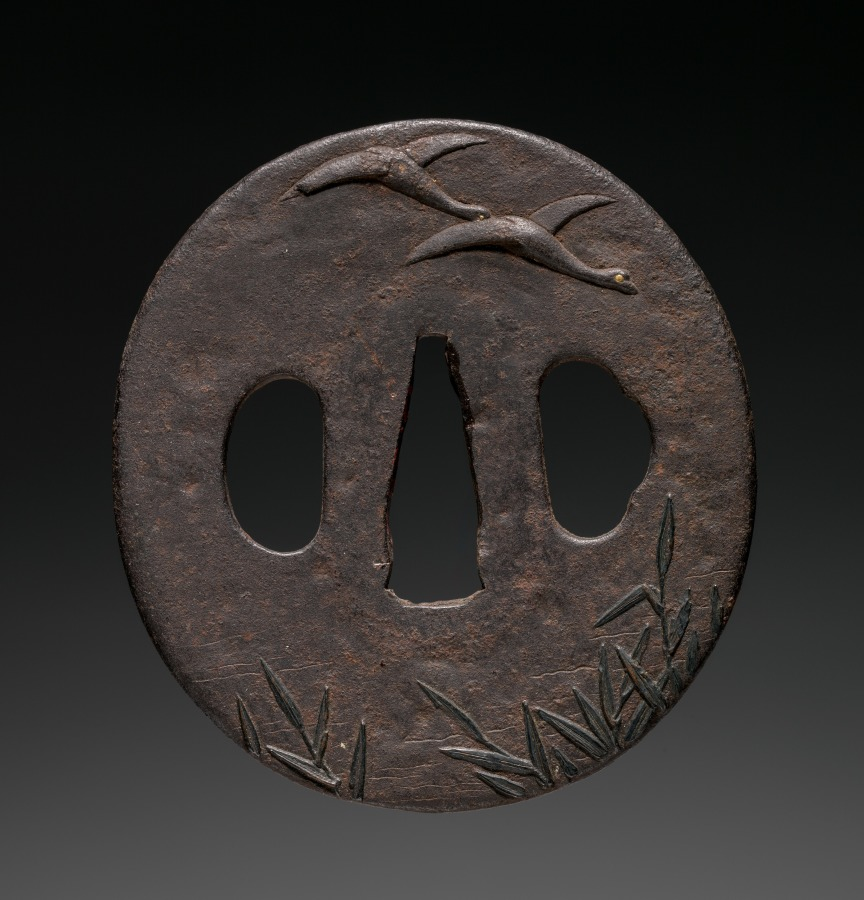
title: Sword Guard (Tsuba) with Reeds and Geese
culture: Japan, possibly Edo period (1615-1868)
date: c. 1615–1868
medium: iron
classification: Arms and Armor